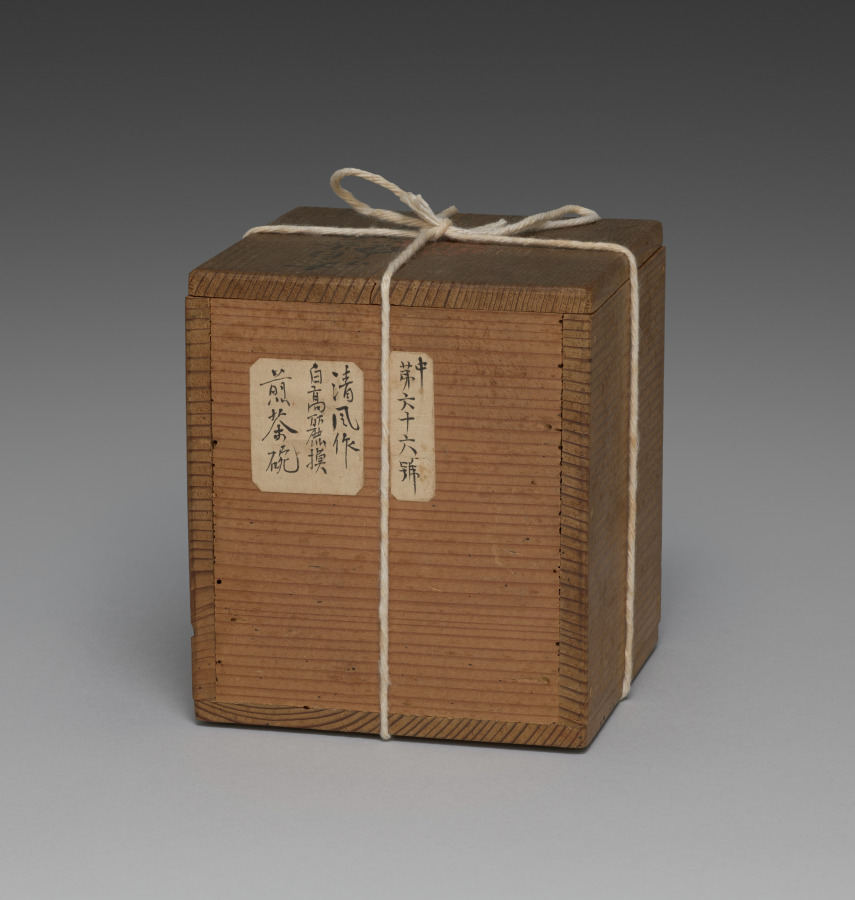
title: Teacups with Floral Band Motif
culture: Japan, Meiji period (1868–1912)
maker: Seifū Yohei III (Japanese, 1851–1914)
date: 1893–1914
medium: Set of five teacups; porcelain with incised decoration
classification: Ceramic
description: The five sencha teacups in this set are decorated with incised flowers and dots between a double band at the top and a single band at the bottom. They are in Yohei III’s creamy taihakuji body and glaze. In their motifs, they are quite similar to an incense burner by Yohei III (see CMA 2022.180), but the flowers are even more simple in design, with no open circle at the center. A label affixed to the side of the box refers to them as “sencha cups in emulation of Korean white [ware].” The reference to Korean ware indicates that even though Yohei was more directly inspired by Qing dynasty wares from the Dehua kilns in Fujian Province in developing his porcelain clay and glaze for works such as these, the general understanding of the continental models still placed them, at least in terms of color, among pieces broadly associated in Japan with Korean white wares. The delicate cups are thinly potted, so they have a highly desirable translucency.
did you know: The delicate cups are thinly potted, so they have a highly desirable translucency.